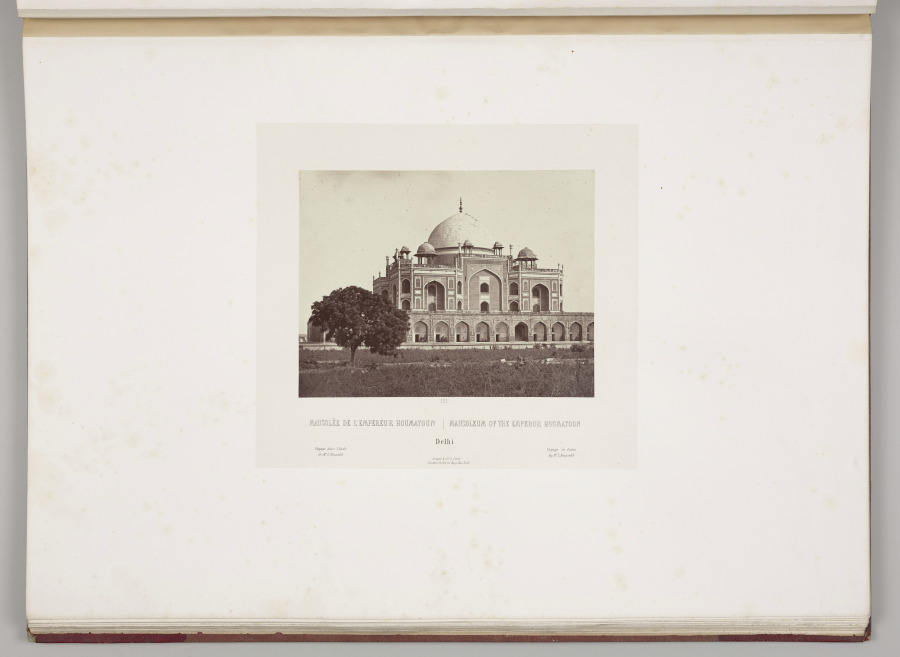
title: Mausoleum of the Emperor Hoomayoon, Delhi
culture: France, 19th century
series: India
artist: Louis-Théophile Marie Rousselet (French, 1845–1929)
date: 1865–68, published 1869–70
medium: Albumen print from glass plate negative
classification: Photograph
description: Concerned that his drawings did not do justice to the splendor of India’s monuments, Rousselet learned photography in India that year, a remarkable accomplishment. He proved to be a talented photographer with a sophisticated sense of composition. The scenes in this volume sweep across sites of Sultanate, Rajput, and Mughal power in northern India, from the sacred Hindu city of Varanasi on the Ganges River to Alwar in Rajasthan. Also included are several scenes of industry and portraits of Indian rulers.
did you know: Louis Rousselet described himself as a “scientific traveler” when he went to India alone at age 18 in 1863 and stayed into 1868.